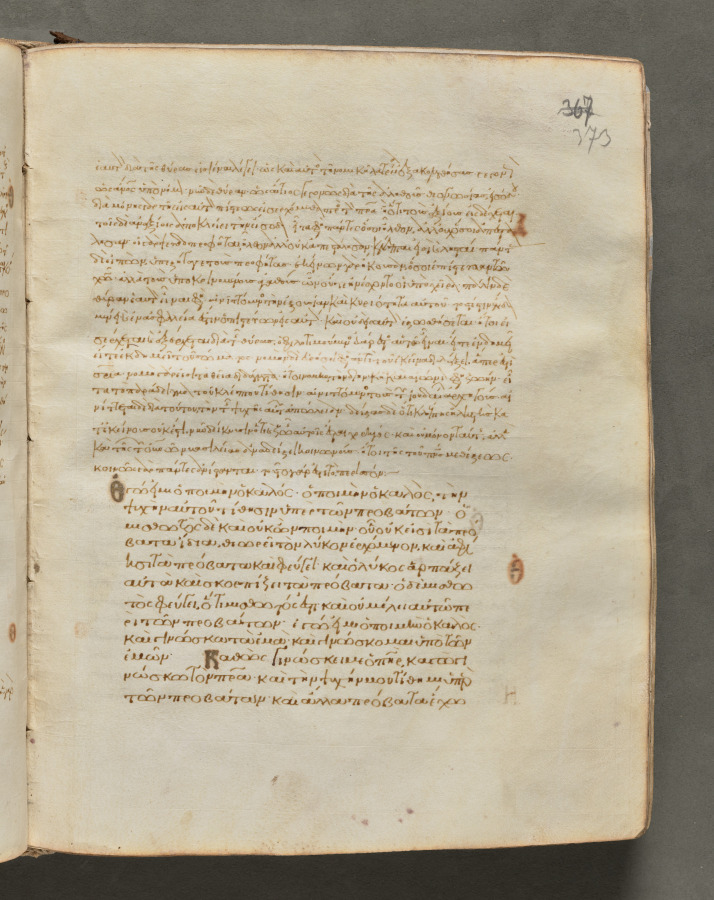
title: Text, folio 373 (recto), from a Gospel Book with Commentaries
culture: Byzantium, Constantinople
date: c. 1000–1100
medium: ink, tempera, and gold on vellum; leather binding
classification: Bound Volume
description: Each of the four gospels in this book opens on a page with brilliantly illuminated borders depicting the author of the text as well as birds—principally peacocks, symbols of the immortality of the soul—and fountains, representing the fountain of life and the salvation of the soul. This volume consists of 428 leaves with texts in Greek. Its level of sophistication suggests that it was probably written and decorated in a monastery in Constantinople.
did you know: Gospel books were carried in procession through Byzantine churches.